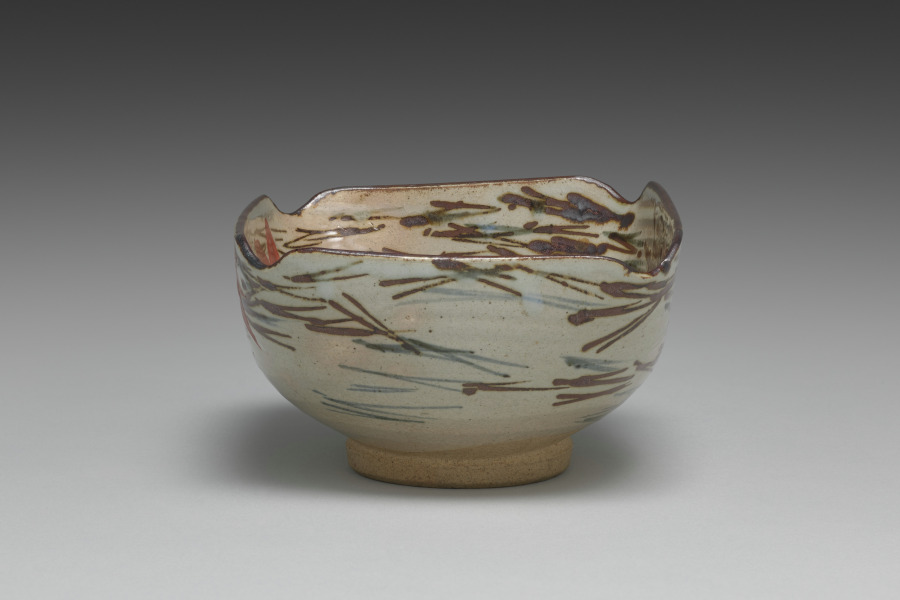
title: Nesting Dish with Scattered Pine Needles and Maple Leaves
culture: Japan, Edo period (1615–1868)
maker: Seifū Yohei I (Japanese, 1801–1861)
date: 1861–78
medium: One of a pair of side dishes; stoneware with underglaze blue and iron oxide, white slip, and overglaze color enamel (Kyoto ware)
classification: Ceramic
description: Seifū Yohei I made both blue and white porcelains after Ming dynasty (1368–1644) Chinese wares fired in the kilns at Jingdezhen for export. He also made colorful stoneware in the style of his teacher, Nin’ami Dōhachi (Takahashi Dōhachi II) (1783–1855).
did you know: Where he intended to place the maple leaves, Yohei I first applied a white color, which can be seen around the leaf edges under the glaze. This layering on top of the white brightens the color of the translucent red overglaze.